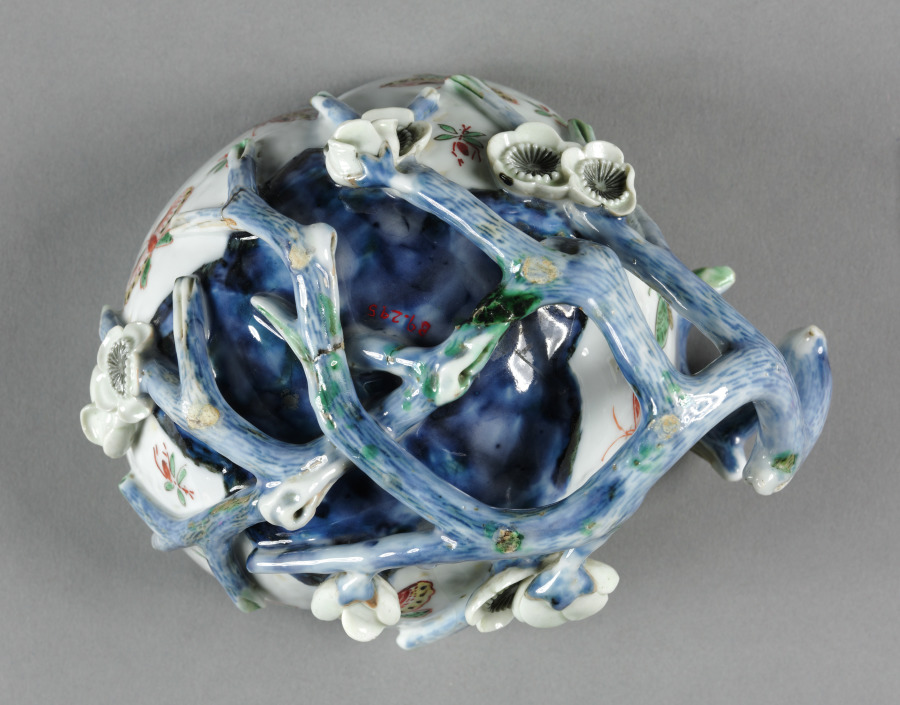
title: Plum Blossom Cup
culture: China, Jiangxi province, Jingdezhen kilns, "Transitional period", Ming dynasty (1368-1644), Tianqi reign (1621-1627)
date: 1621–27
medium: porcelain with underglaze blue and wucai (five color) overglaze enamel decoration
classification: Ceramic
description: This porcelain cup is considered to have been made in the "Transitional period," a term used to define the period between about 1620 and 1683 when official kilns in Jingdezhen were no longer under imperial supervision due to the transition from the Ming to the Qing dynasties.